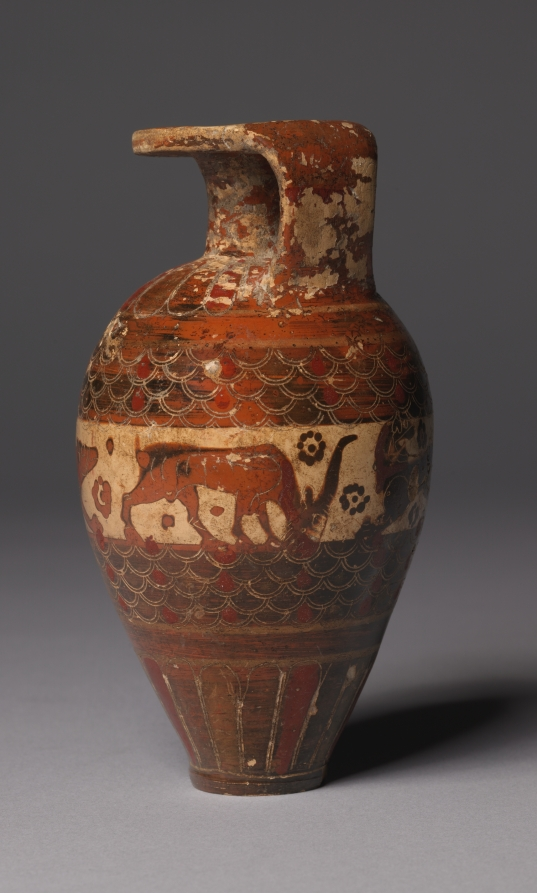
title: Protocorinthian (Early Black-Figure) Aryballos (Oil Flask): Animals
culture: Greek, Corinthian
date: c. 650–640 BCE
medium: ceramic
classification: Ceramic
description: Tongues encircle the rim, shoulder, and base of this small oil vessel, while two carefully incised bands of scales frame an animal frieze. Here, amid dot rosettes, are a bull, dog, and goat, all facing right, and a left-facing lion with head turned back. The black glaze has misfired red in many places, while added red enlivens numerous tongues, scales, and internal details.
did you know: Artists may have used a compass-like tool to create the intricate scale patterns.